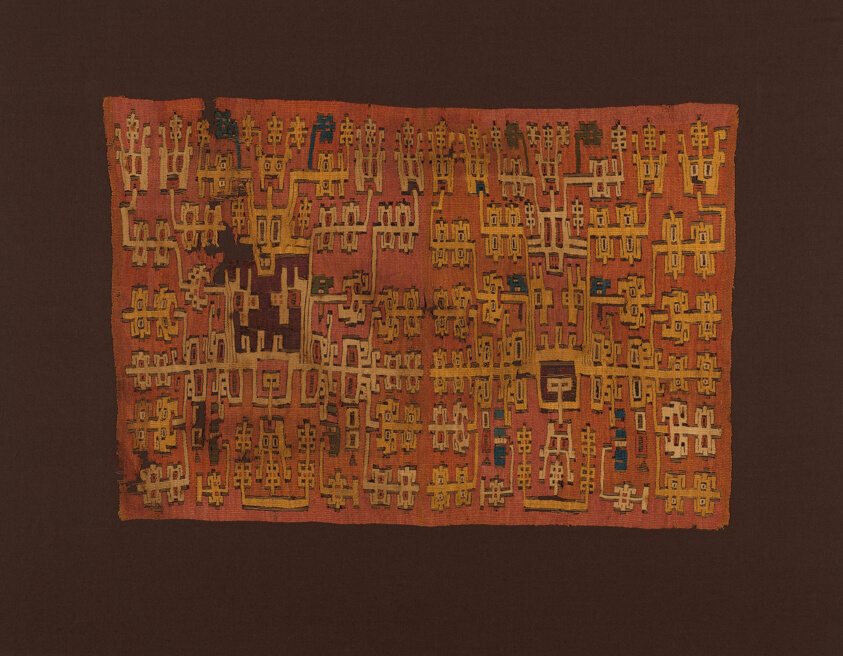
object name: Textile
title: Panel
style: nazca, early intermediate period, Pre-Columbian, americas, andean, andes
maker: Nazca; South coast, Peru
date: Possibly 500/600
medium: Cotton and wool (camelid), slit tapestry weave with outlining wefts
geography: Peru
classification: weaving; textile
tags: anthropomorphic figure, diety, headdresses, heads, masks, ornaments, super/natural